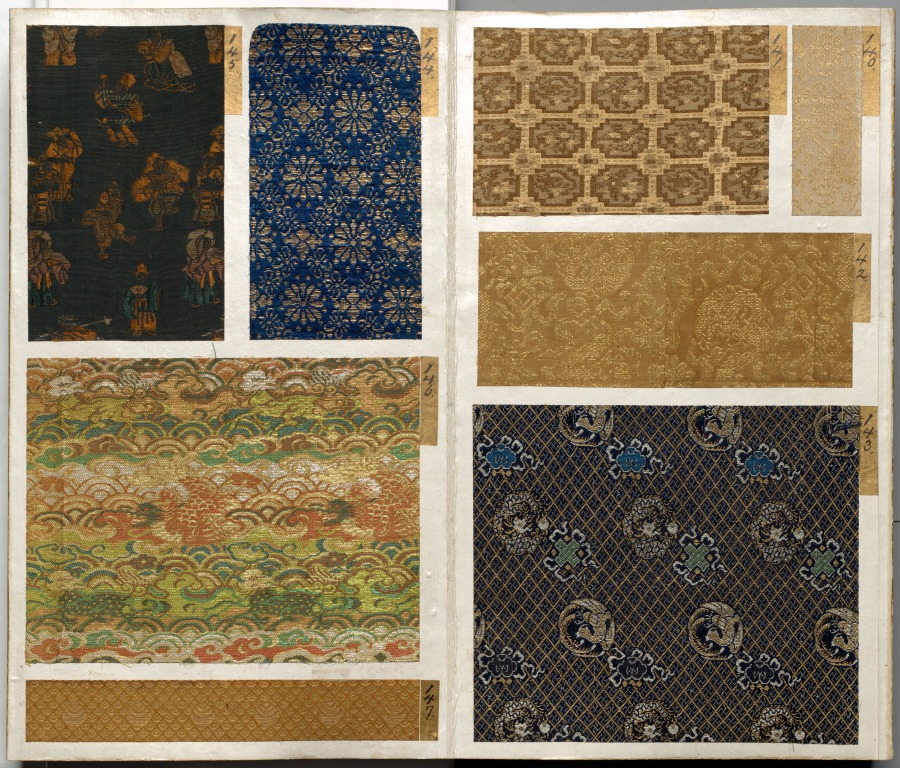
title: Album of Textile Samples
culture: Japan, Edo period (1615–1868)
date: 1600s-1700s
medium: silk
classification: Textile